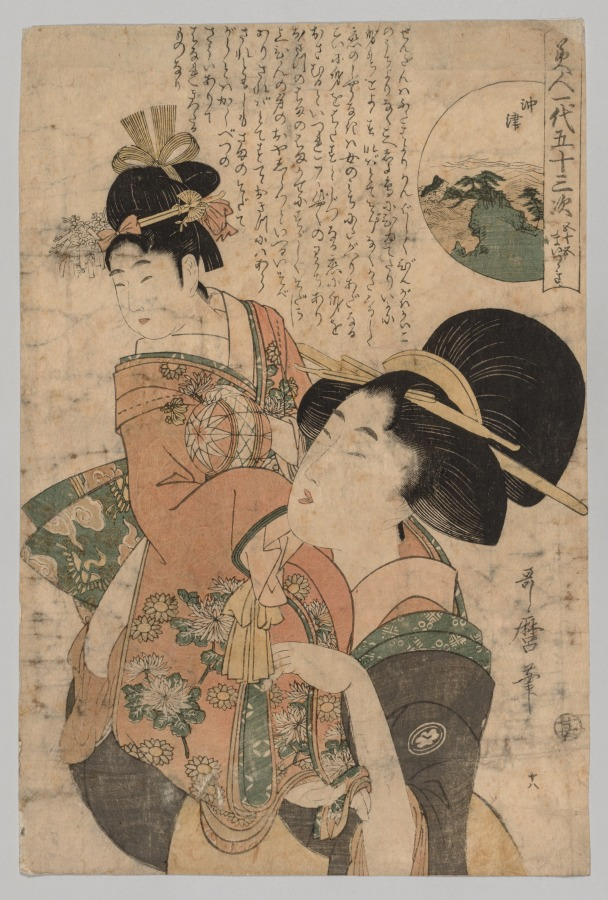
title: Nakatsu, from the series Fifty-three Stations in the Life of a Beauty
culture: Japan, Edo period (1615–1868)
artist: Kitagawa Utamaro (Japanese, c. 1754–1806)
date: c. 1803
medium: color woodblock print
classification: Print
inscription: Signature: Utamaro hitsu Publisher Seal: Maruya Jimpachi